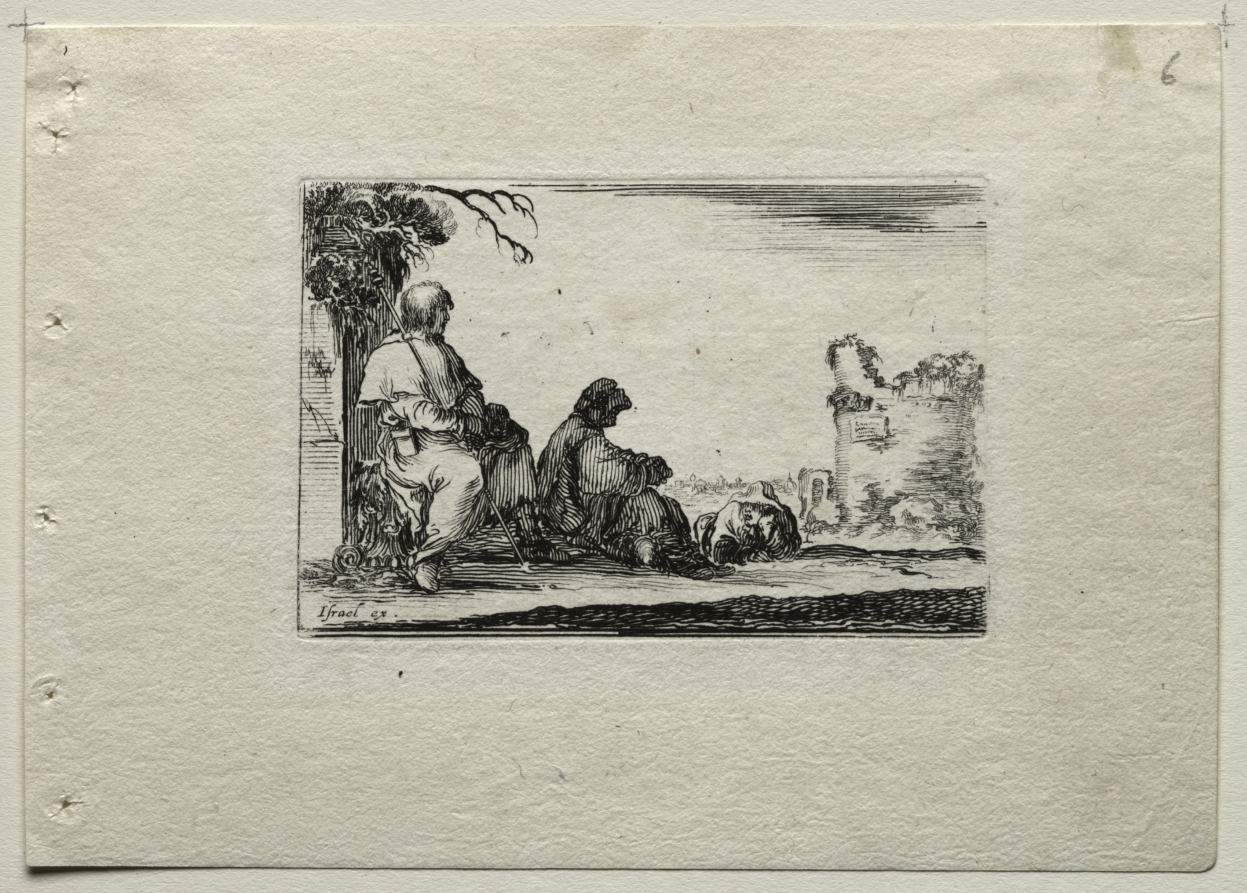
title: Caprices: Two Pilgrims Resting and a Peasant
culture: Italy, 17th century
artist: Stefano Della Bella (Italian, 1610–1664)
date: c. 1642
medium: etching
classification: Print